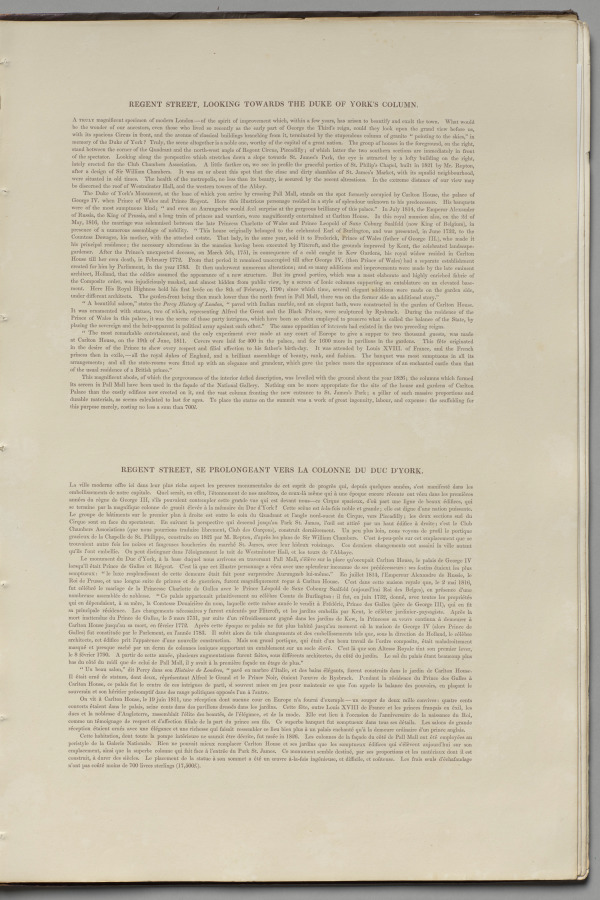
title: London As It Is: Regent Street, looking towards the Duke of York's Column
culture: England, 19th century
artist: Thomas Shotter Boys (British, 1803–1874)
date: 1842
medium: lithograph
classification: Bound Volume